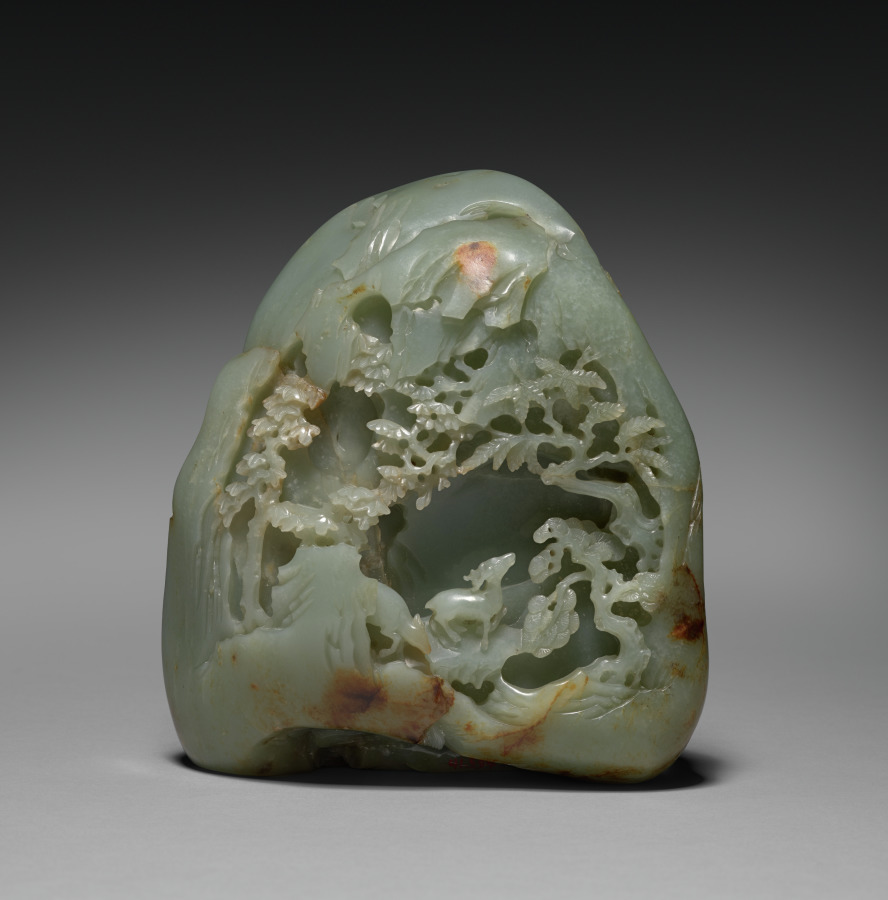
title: Miniature Mountain with Daoist Paradise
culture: China, Qing dynasty (1644–1911), Qianlong reign (1736–95)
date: 1736–95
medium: green jade with brown markings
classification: Jade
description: Sizable jade boulders of mountainous landscapes were carved to represent the search for the paradise or immortals' dwellings in the mountains. This Daoist theme has fired the Chinese imagination throughout history. Believed to have spiritual and magical properties, jade has long been used in tombs and intended for preserving the corporeal body and the soul in the quest for eternity. It is recorded that Daoist practitioners drank morning dews with scraps of jade as an elixir of immortality.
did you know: The bearded immortal is accompanied by a servant carrying a cluster of peaches, symbols of immortality.